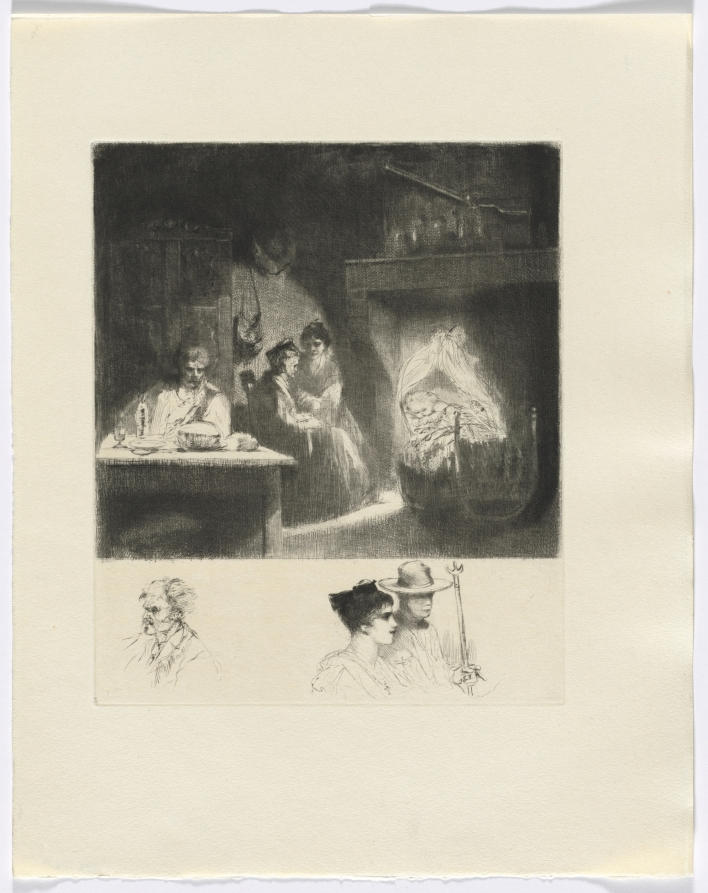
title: Frédéric Mistral: Mémoires et Recits by Frédéric Mistral: family scene/ bust of three figures (insert after p. 48)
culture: France, 20th century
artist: Auguste Brouet (French, 1872–1941)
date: 1937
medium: etchings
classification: Portfolio